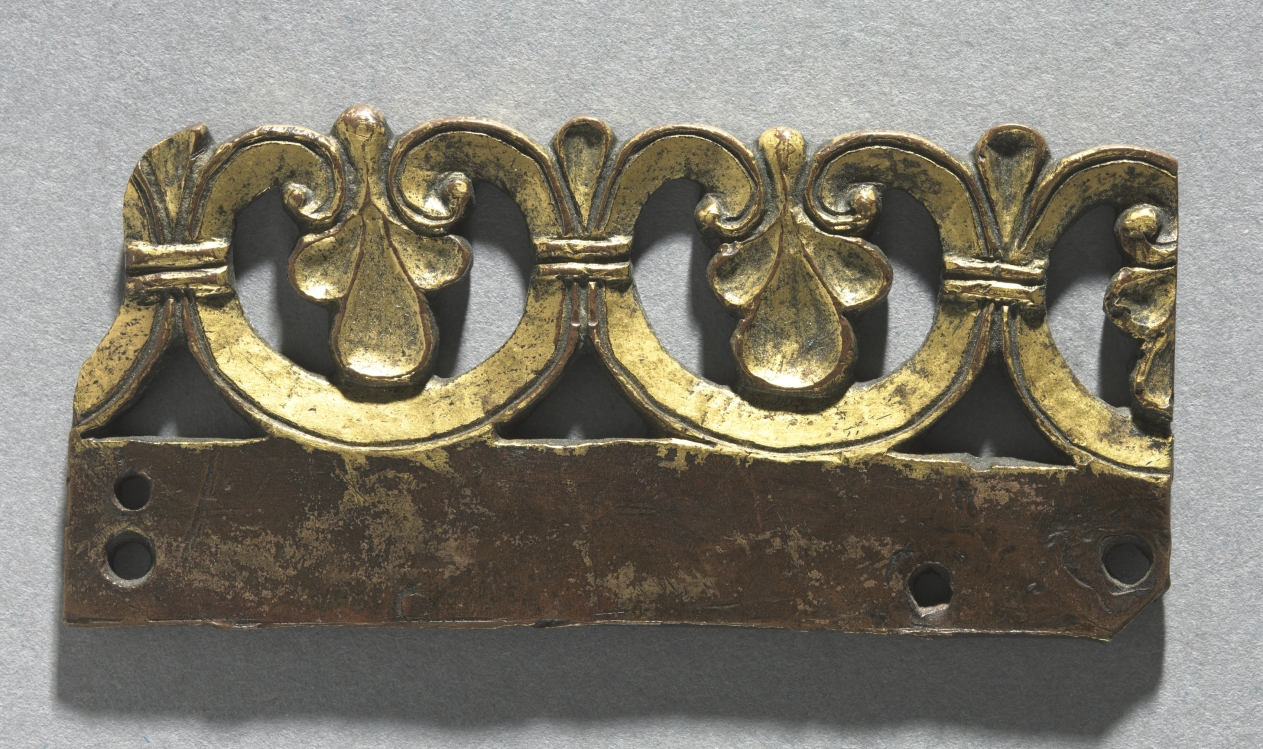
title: Fragment of an Ornamental Crest from a Reliquary Shrine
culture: Mosan, Meuse Valley, Maastricht?, 12th century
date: c. 1165–1180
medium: gilded copper, émail brun (brown enamel)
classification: Metalwork